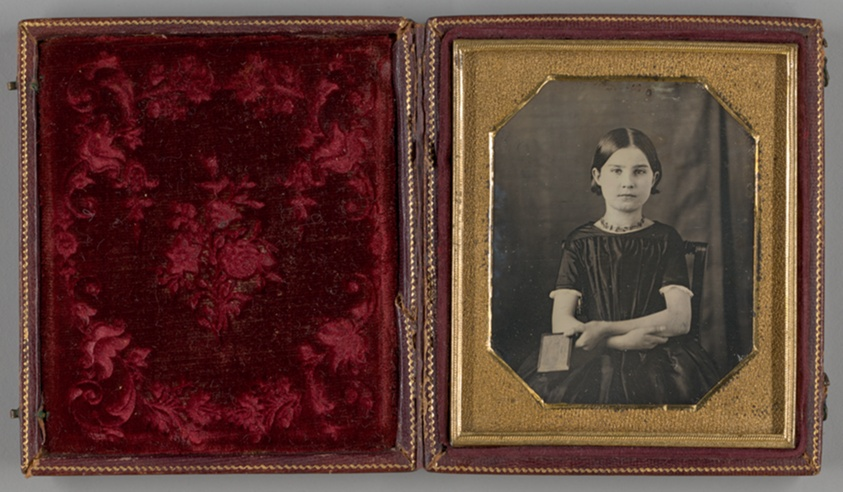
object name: Photograph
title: Untitled (Young Girl Holding Photograph)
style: 19th century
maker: Artist unknown; 19th century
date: 1839/99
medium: Daguerreotype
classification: photography; photograph